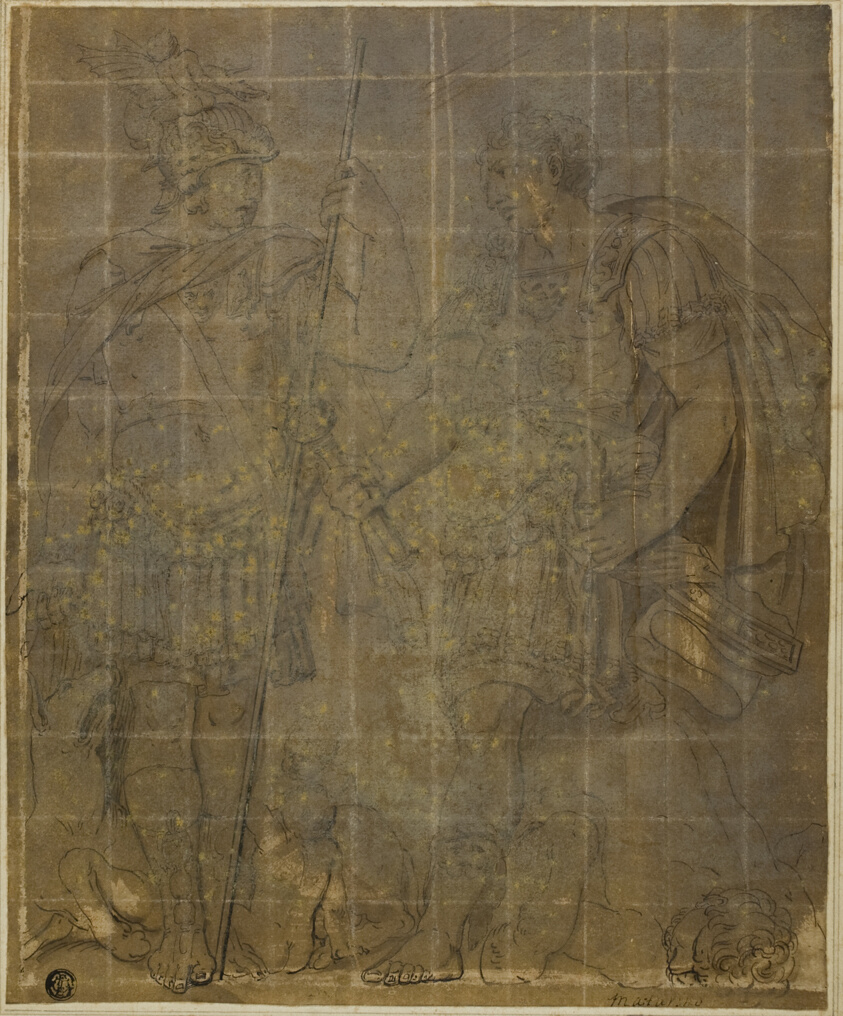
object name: Drawing and Watercolor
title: Two Roman Warriors with She-Wolf, Romulus, and Remus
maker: After Polidoro Caldara, called Polidoro da Caravaggio; Italian, c. 1499-c. 1543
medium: Pen and black ink, with brush and brown wash, on cream laid paper, prepared with a brown wash and squared in white chalk, laid down on cream card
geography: Italy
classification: ink with wash; drawings (visual works); prints and drawing